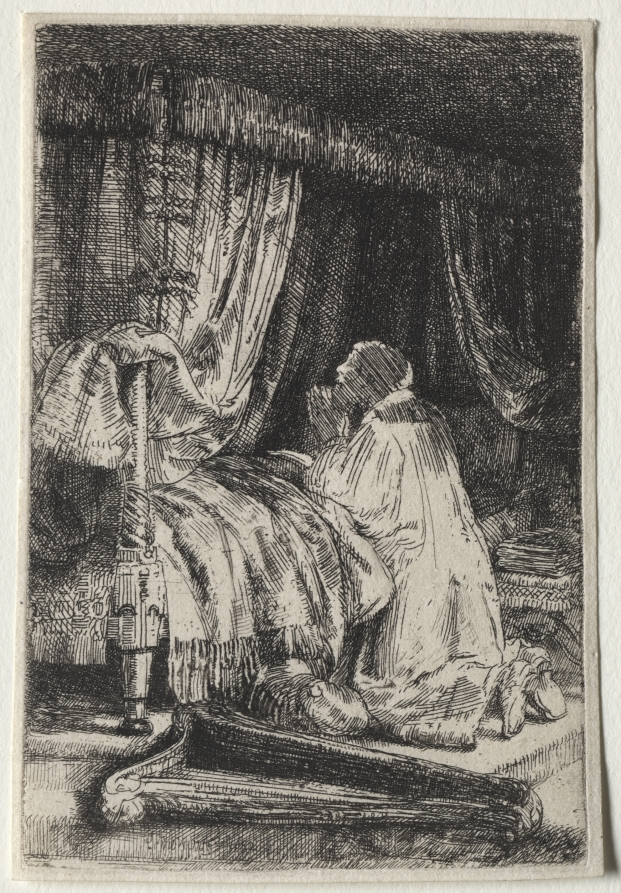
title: David in Prayer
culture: Netherlands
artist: Rembrandt van Rijn (Dutch, 1606–1669)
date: 1652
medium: etching with drypoint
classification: Print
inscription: lower left, in plate: Rembrandt f. 1652